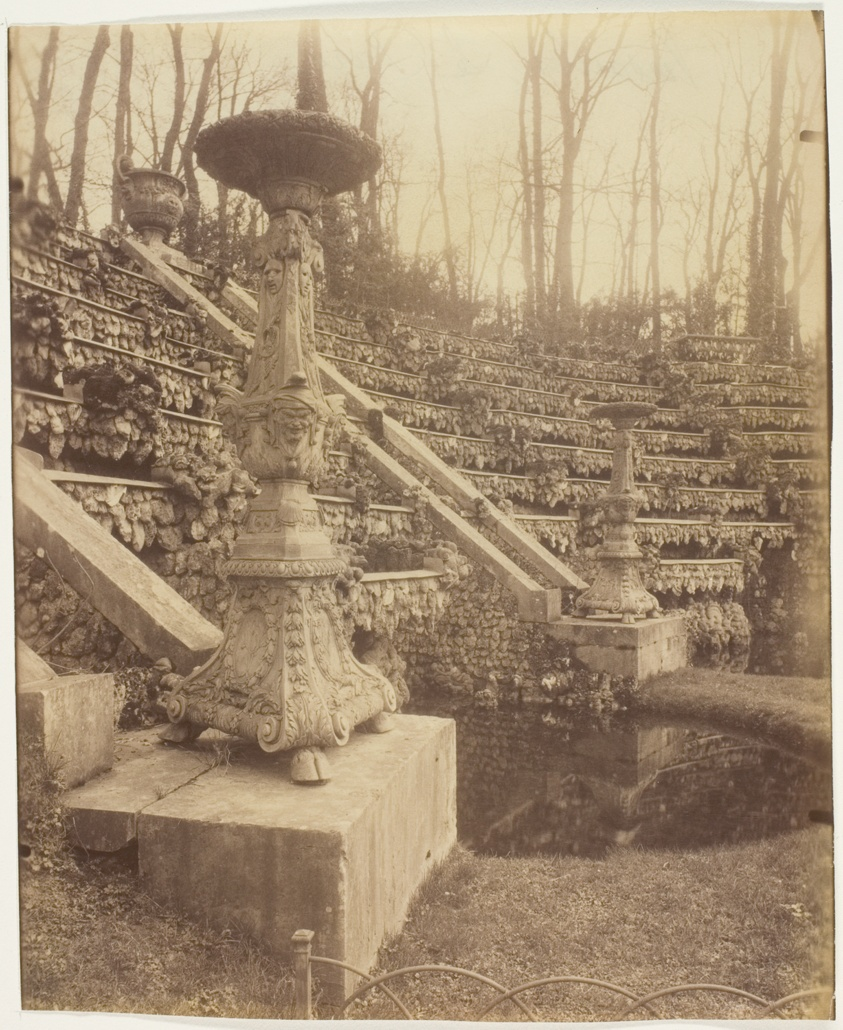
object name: Photograph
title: Versailles, Le Parc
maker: Jean-Eugène-Auguste Atget (French, 1857–1927)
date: 1906/07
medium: Albumen print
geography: France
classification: albumen silver print; photographic process; photography; photograph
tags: Collected by Hugh Edwards